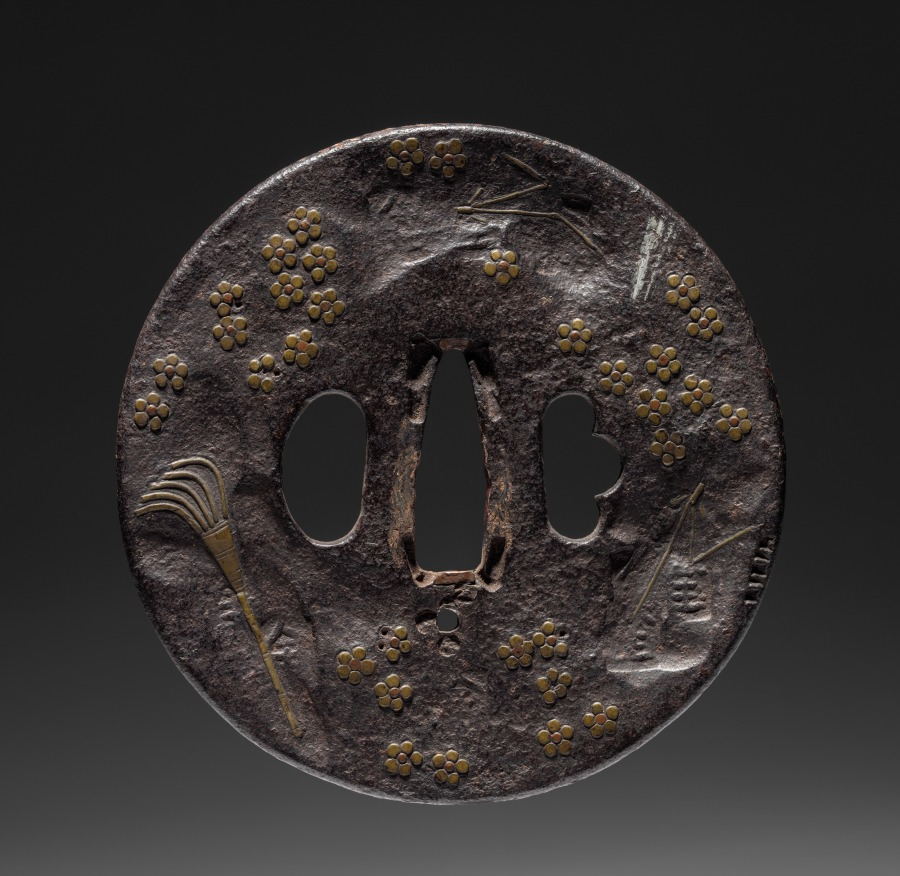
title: Sword Guard (Tsuba)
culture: Japan, possibly Edo period (1615-1868)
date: c. 1615–1868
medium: iron with brass inlay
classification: Arms and Armor